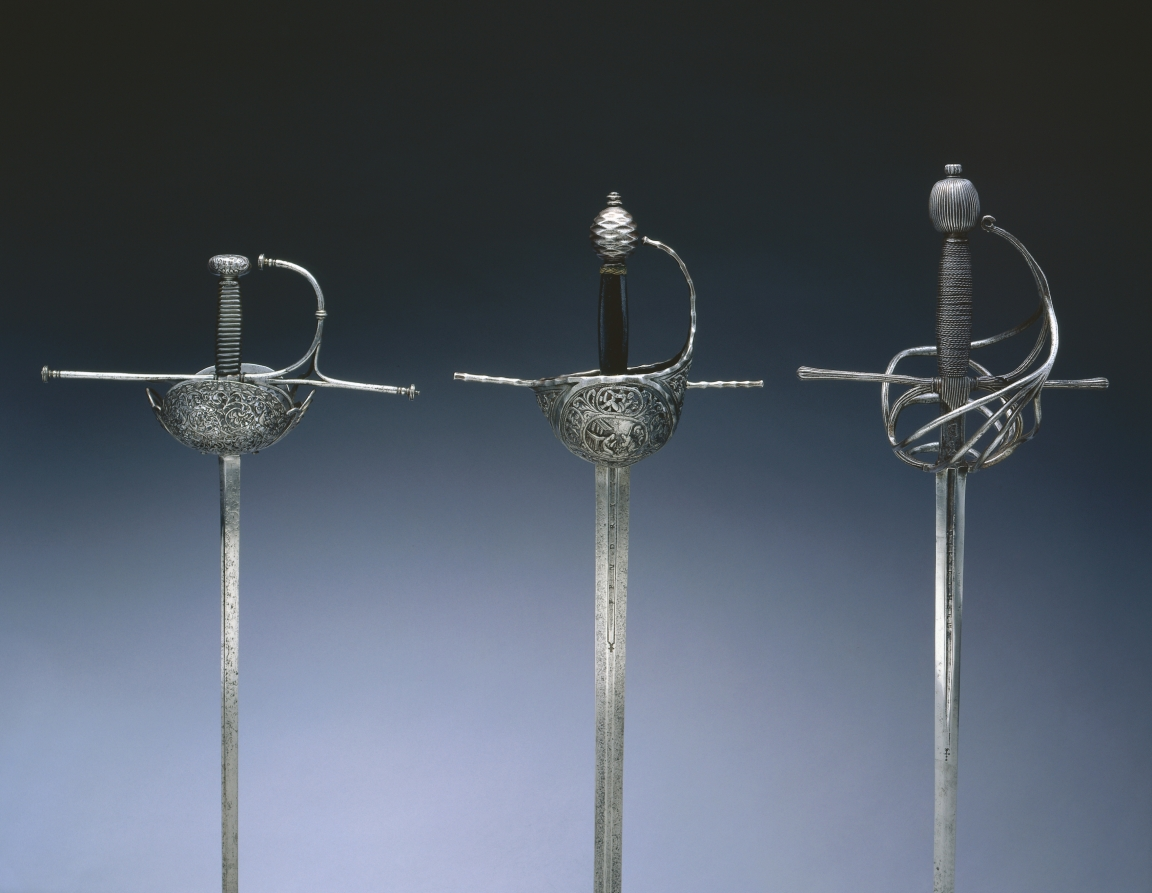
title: Cup-Hilted Rapier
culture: Italy, Milan?, 17th century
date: c.1610–30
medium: steel, pierced, chased and chiseled; wire ferrules on leather-covered wood grip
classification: Arms and Armor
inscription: inscribed on blade: FPNDRITH (on one face) RDFTPHNI (on the other)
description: The rapier was a sword worn with civilian dress and used in duels. The term rapier derives from a 16th-century French word rapière, which in turn derived from the Spanish espada ropera, or “dress sword.” The rapier was a light weapon with a straight double-edged and pointed blade that, with the development of the art of fencing in the 1500s and 1600s, gradually became narrower and lighter, and thus suitable for thrusts only. With the new technique of swordplay emphasizing the point of the blade, sword guards became more complex to protect the duelist’s unarmored hand. These elaborate guards were frequently decorated by various techniques—chiseling, bluing, russeting, and damascening.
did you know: Over time the blade of a rapier became longer, based on a belief that a longer blade made it easier to hit one's adversary and, at the same time stay beyond the reach of his weapon.